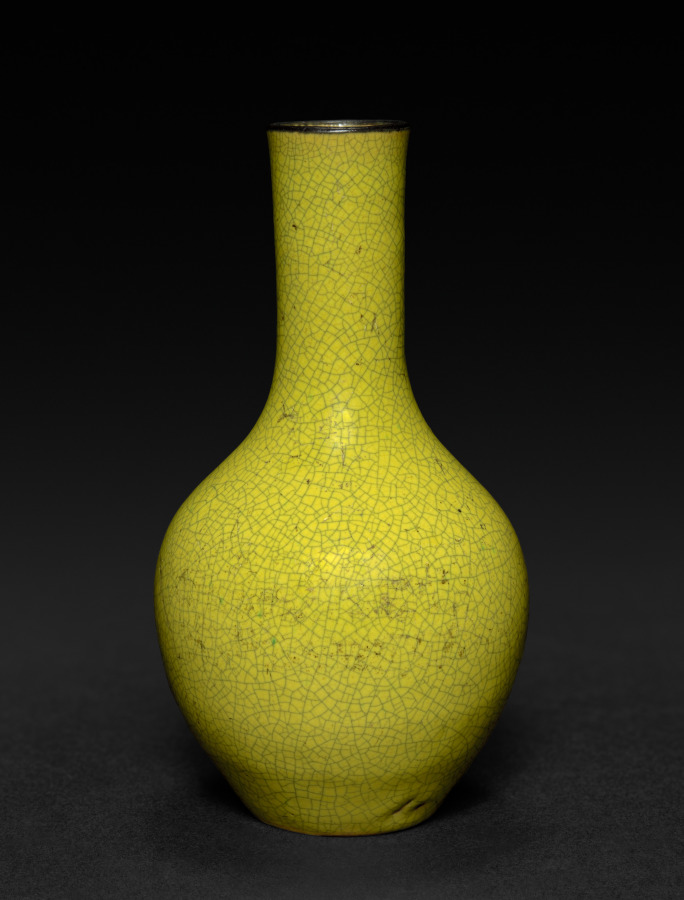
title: Vase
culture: China, Qing dynasty (1644-1911)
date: 1644–1911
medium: porcelain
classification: Ceramic